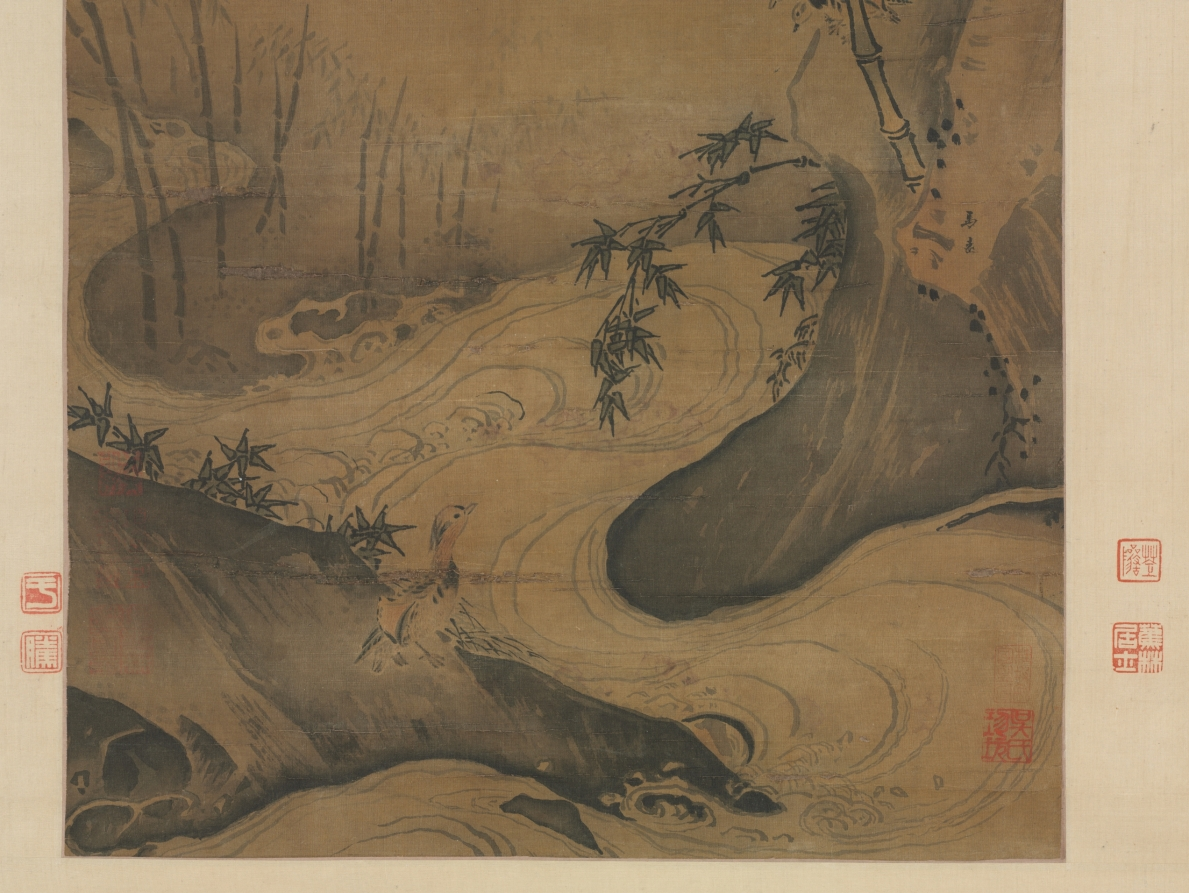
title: Bamboo and Ducks by a Rushing Stream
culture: China, Southern Song dynasty (1127–1279)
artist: Ma Yuan (Chinese, c. 1150–after 1255)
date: 1127–1279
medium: hanging scroll; ink and light color on silk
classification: Painting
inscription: 馬遠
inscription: 12 additional seals: 1 of An Kuo (1481–1534); 7 of Hsiang Yüan-pien (1525–1590); 2 of Liang Ch'ing-piao (1620–1691); 2 unidentified. (WKH)